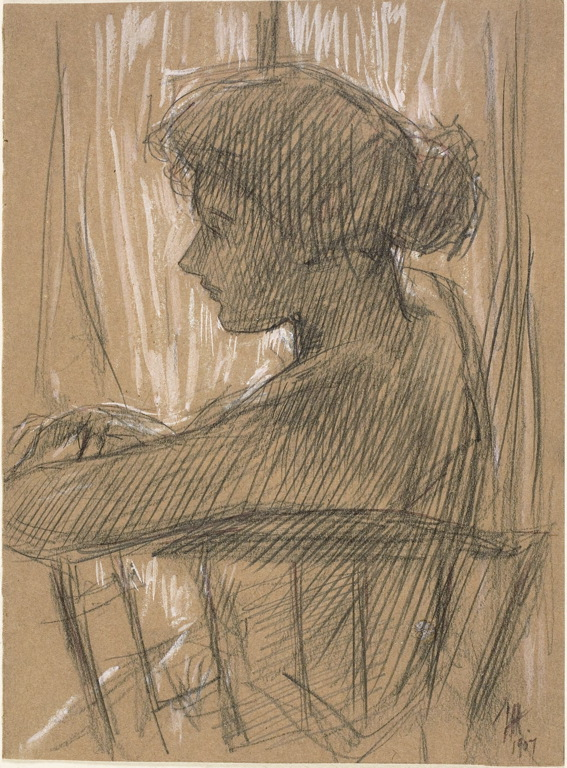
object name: Drawing and Watercolor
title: Against the Light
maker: Childe Hassam (American, 1859-1935)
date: 1907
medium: Graphite, with touches of pen and brownish-red ink and with brush and pink goauche, on dark tan wove paper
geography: United States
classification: graphite; drawings (visual works); prints and drawing